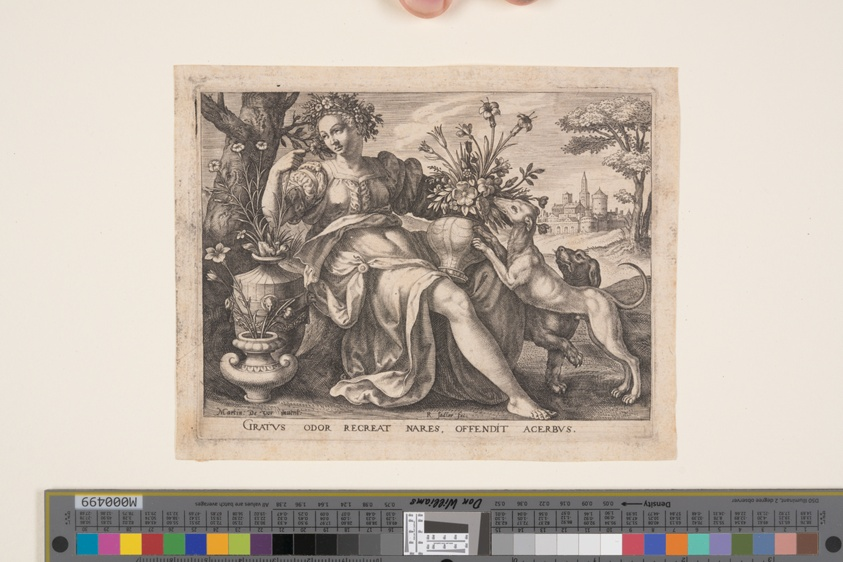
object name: Print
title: Smell, from The Five Senses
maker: Raphael Sadeler I (Flemish, 1560/61–1628/32); after Maarten de Vos (Flemish, 1532–1603)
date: 1581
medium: Engraving on paper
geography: Flanders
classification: engraving; paper; print; prints and drawing